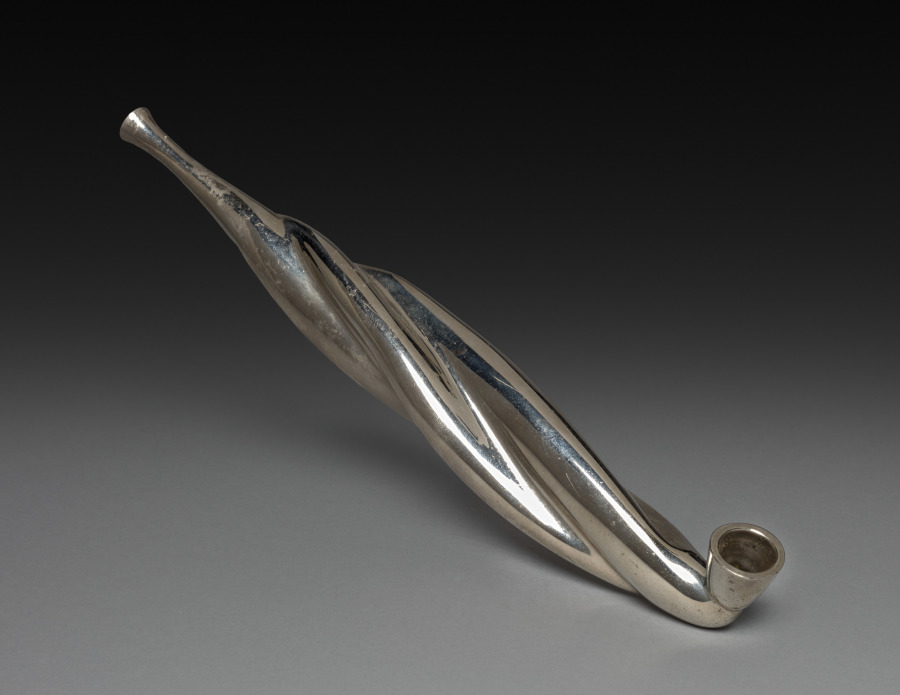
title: Tobacco Pipe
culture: Japan, Edo period (1615–1868) to Meiji period (1868–1912)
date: 1800s–early 1900s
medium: metal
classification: Miscellaneous